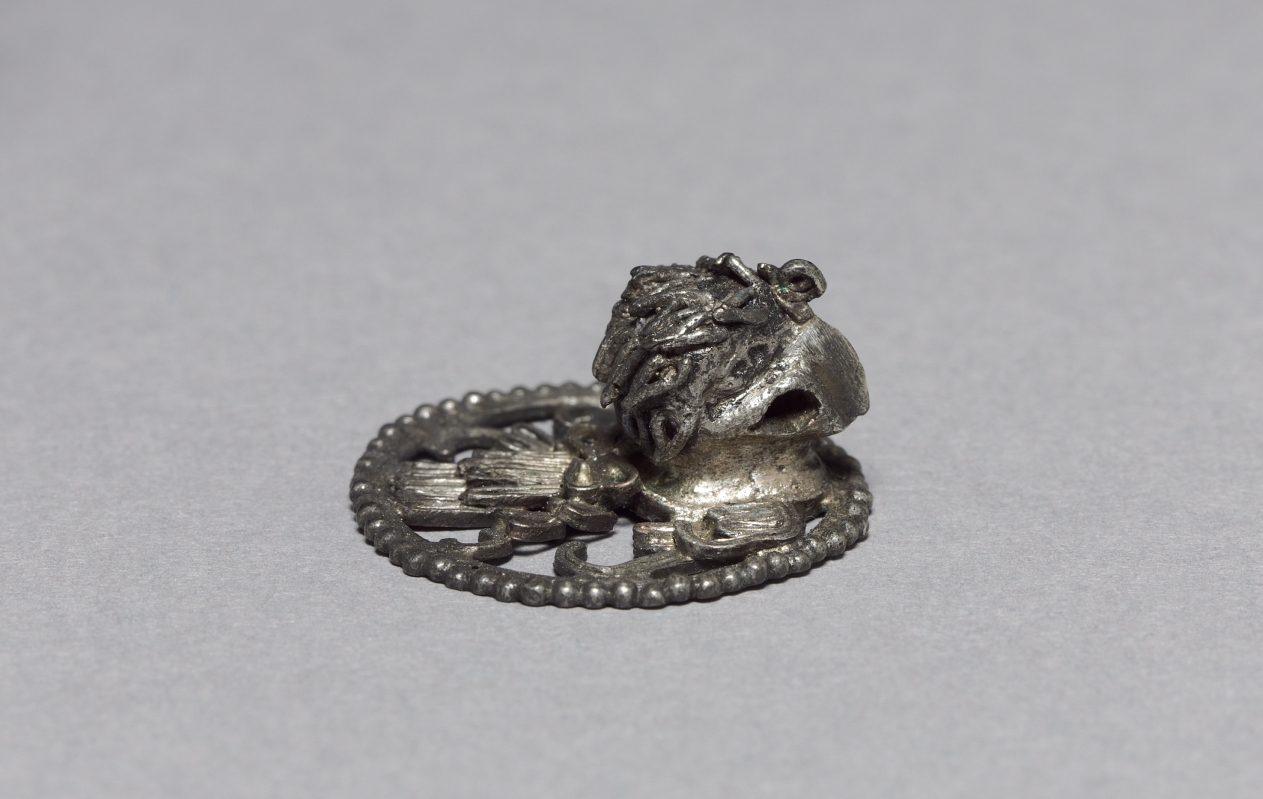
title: Eagle Ornament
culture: Mexican, Oaxaca, Mixtec style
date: c. 1200–1519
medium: silver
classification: Metalwork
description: An additional ornament probably once dangled from the eagle's beak. Similar jewelry has been found in high status Mixtec tombs at Zaachila and at Monte Albán, a Zapotec site controlled by the Mixtec after about AD 750.